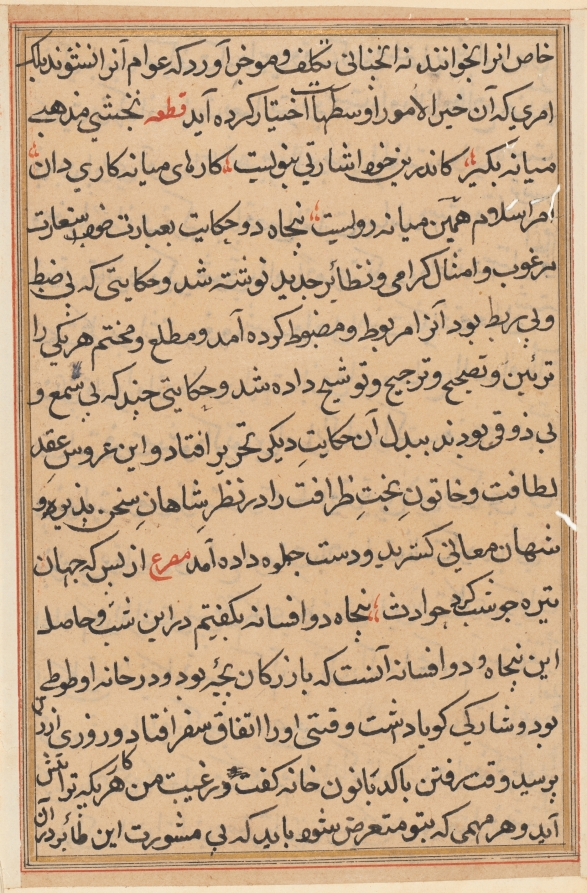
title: Page from Tales of a Parrot (Tuti-nama): text page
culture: Mughal India, court of Akbar (reigned 1556–1605)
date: c. 1560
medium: gum tempera, ink, and gold on paper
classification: Painting